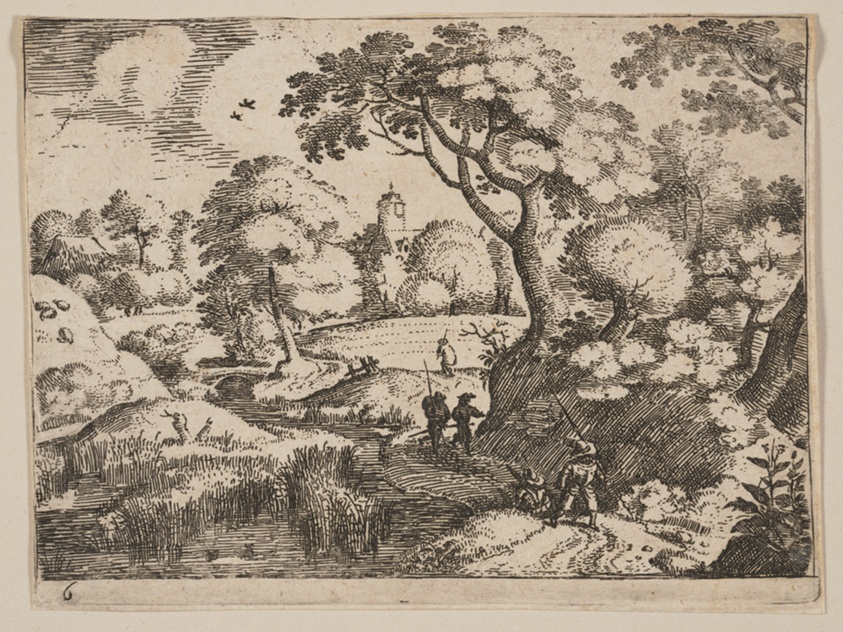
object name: Print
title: Path between Swamp and Wooded Bank, from Landscapes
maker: Jacob Savery; Flemish, 1566–1603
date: c. 1595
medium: Etching on ivory laid paper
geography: Flanders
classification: etching; paper; print; prints and drawing